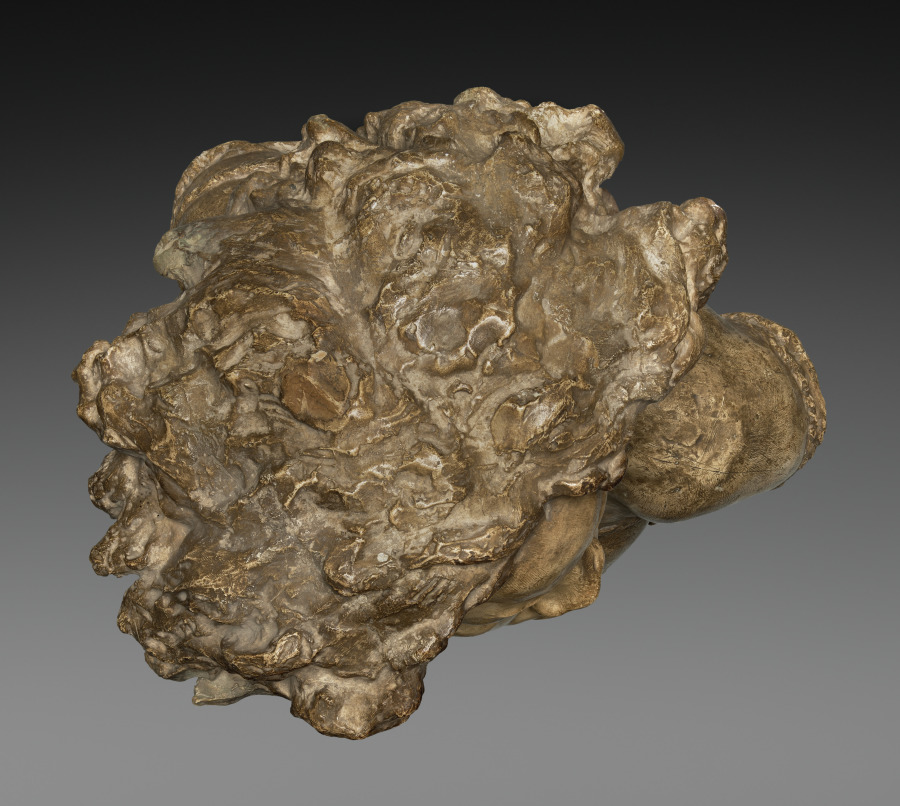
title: Why Born Enslaved!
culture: France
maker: Jean-Baptiste Carpeaux (French, 1827–1875)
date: 1867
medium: Plaster, original polychromed surface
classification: Sculpture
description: One of the most powerful expressions of abolitionist sentiment in the visual arts, Why Born Enslaved! depicts an African woman bound by ropes and looking defiantly upward. The ropes press painfully into her breasts; her torn blouse alludes to the violence responsible for her condition. The original, polychromed surface is covered with complex, nuanced hatchings and subtle modeling. Evidence indicates that this masterpiece of 19th-century French sculpture served as the master model for numerous casts in other museum collections.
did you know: Although officially abolished in France since 1848, slavery remained a hotly contested issue in Carpeaux’s time as it remained legal or tolerated in various countries around the world.